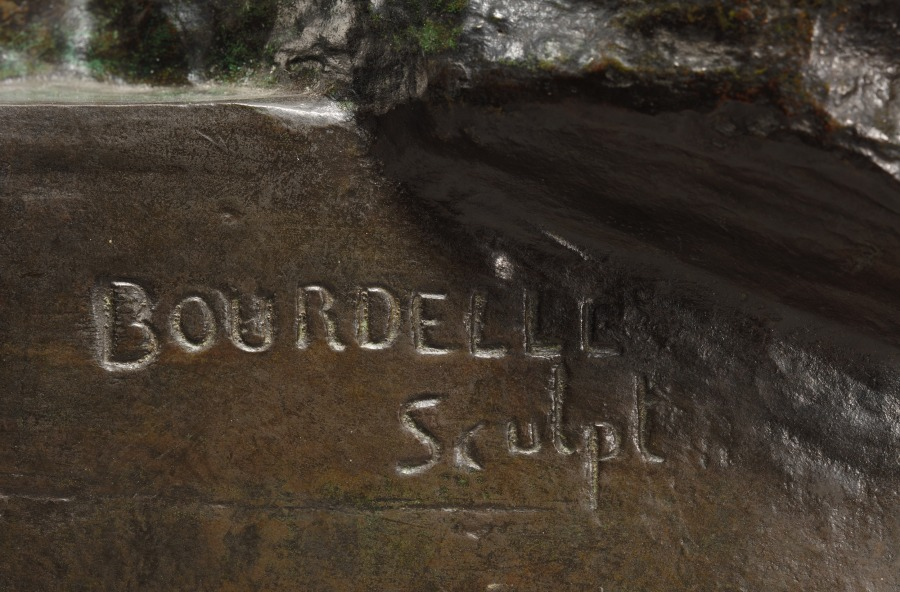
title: Head of Beethoven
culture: France, 19th century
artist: Emile Antoine Bourdelle (French, 1861–1929)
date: 1891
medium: bronze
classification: Sculpture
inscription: Signed left side: "Bourdelle / Sculpt."; inscribed right side: "FONRIENATLE DES BRONZES / J PETERMANN: ST GILLES BRUXELLES"; inscribed on front: "Mon domaine c'est l'air / quand le vent, se leve / mon âme tourbillonne / Beethoven"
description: A pioneer of modern sculpture, Antoine Bourdelle studied at the École des Beaux-Arts in Paris and worked as an assistant to Augustin Rodin, who greatly admired the younger artist’s work. In 1888 Bourdelle produced the first of a series of sculptural portraits of Ludwig van Beethoven, in which the artist orchestrated powerful billowing shapes to convey the creative spirit or genius of the composer. The artist inscribed a quote from Beethoven in the lower left: “My domain is the air; when the wind rises my soul swirls.”